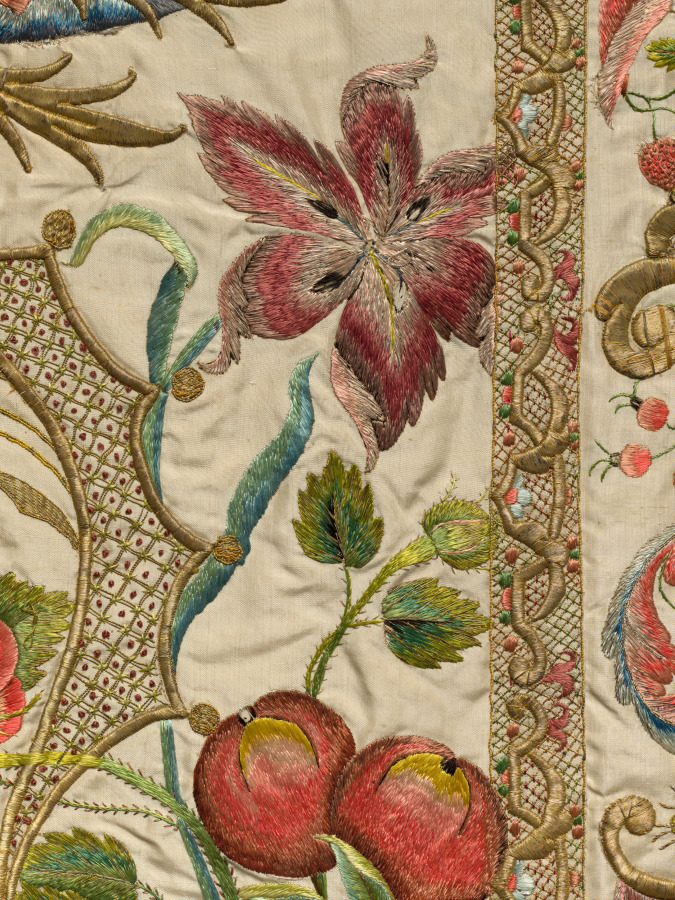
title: Chasuble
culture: Italy or Spain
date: 1700s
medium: Silk and metallic threads: embroidery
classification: Embroidery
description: The chasuble’s exquisite symmetrical decoration highlights its central panel where three illusionary gold containers hold skillfully shaded fruit in pastel silk tones. Delicately curving motifs enhance the side panels along with finely stitched strawberries in so-called French knots. This liturgical chasuble and other vestments, worn over a white alb with lace, were embroidered by professional specialists, such as experts who shaded colored silks or secured gold thread, in early versions of assembly lines that were usually in secular workrooms or in convents. The church or commissioner supplied the raw materials and paid a fee for the work.